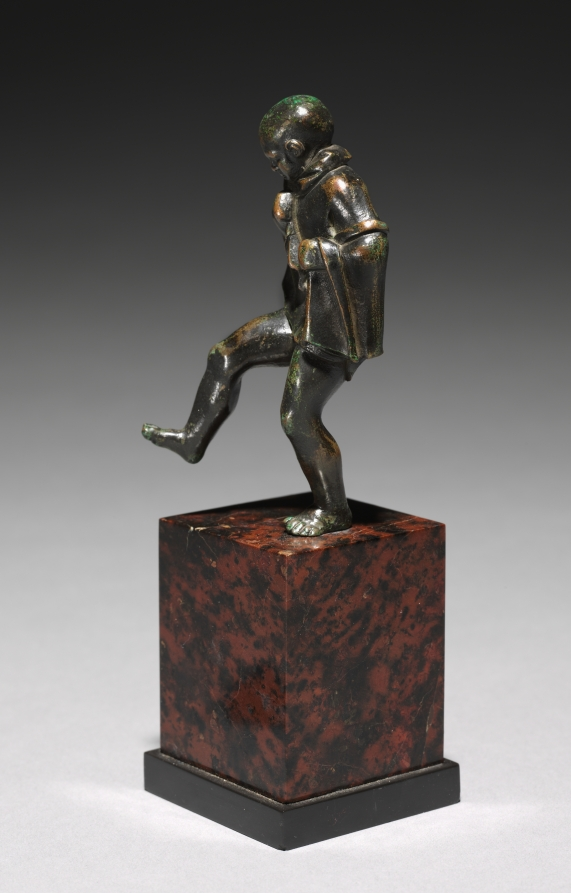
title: Dancing Boy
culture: Northern Italy, early 16th century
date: c. 1500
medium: bronze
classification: Sculpture